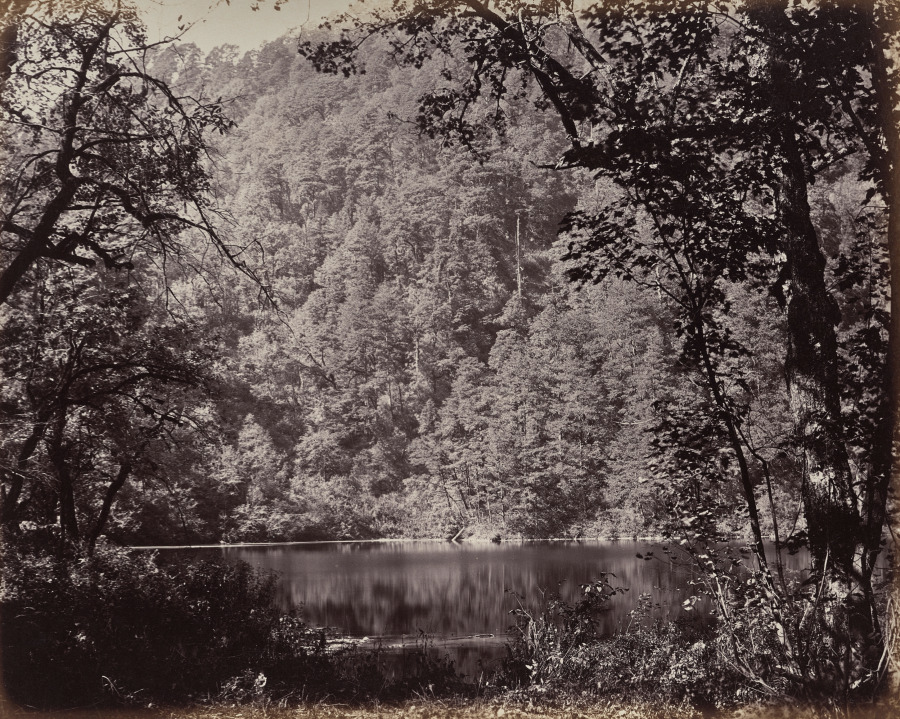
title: The Upper Himmalayahs. The Dodee Tal in Lake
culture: England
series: Photographs of Northern India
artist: Samuel Bourne (British, 1834–1912)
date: 1863–70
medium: albumen print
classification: Photograph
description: The 50 images in this album, all taken in the 1860s, move from the hill towns of the Himalayas down to cities including Lahore (now in Pakistan), Delhi, Lucknow, Agra, Benares (now Varansi), and Calcutta (now Kolkata). Architectural studies of major monuments offer valuable historical records of what sites such as the Taj Mahal and the imperial mosque of the Mughal emperors in Delhi looked like before twentieth-century restorations.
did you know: Samuel Bourne, the author of most the images in this album, was a banker in England before he moved to India to become a professional photographer.